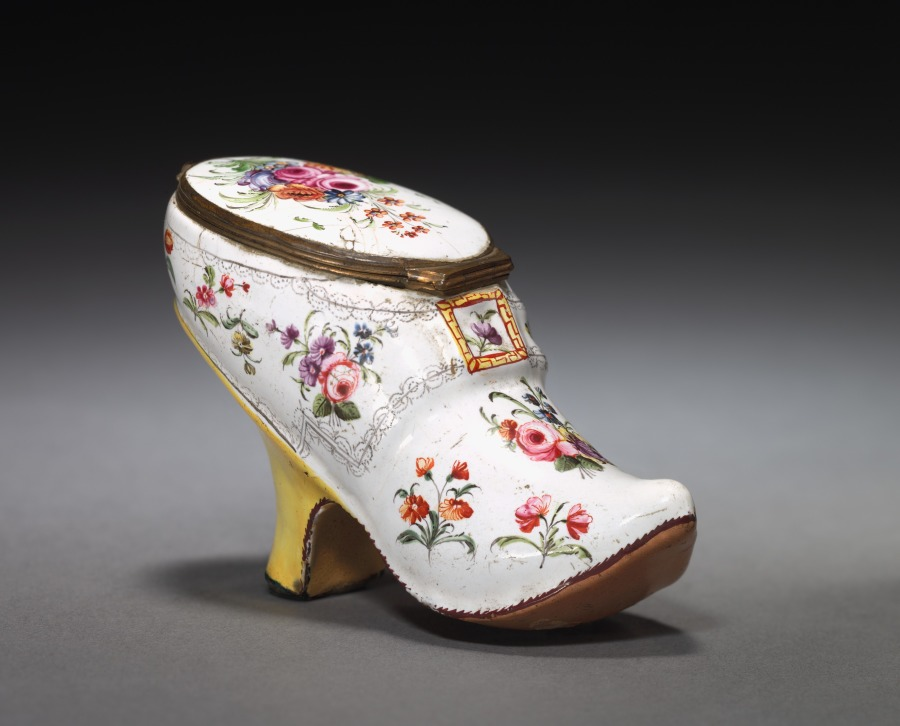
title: Box in Form of Shoe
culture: England or France, mid-18th Century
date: mid-18th century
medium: enamel on copper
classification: Enamel